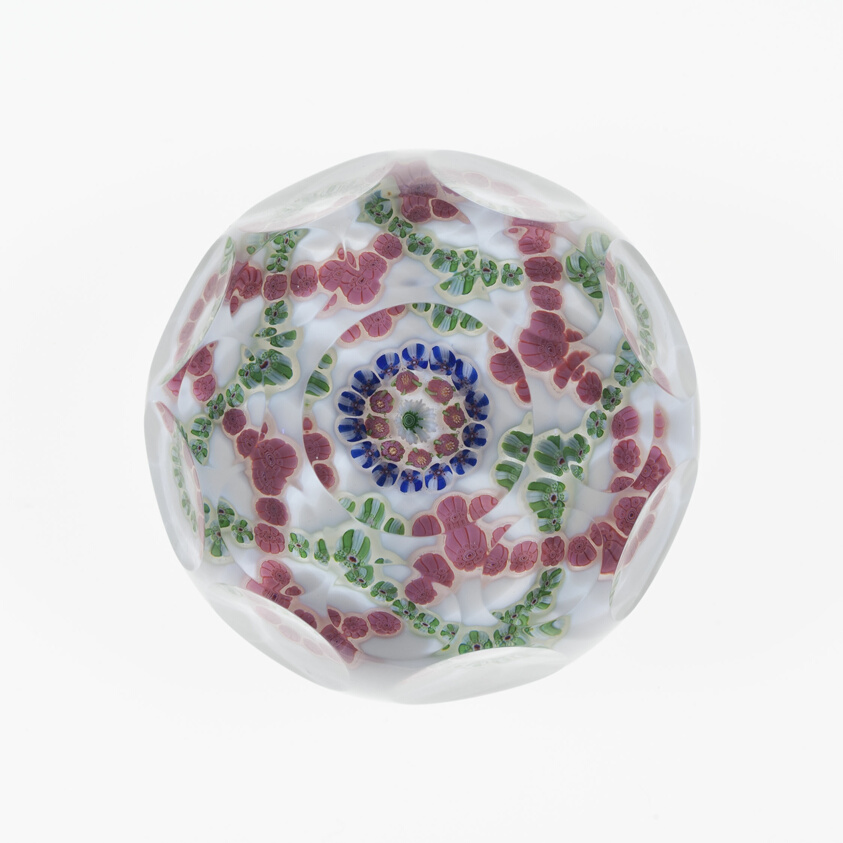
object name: Glass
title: Paperweight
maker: Clichy Glassworks (Cristalleries de Clichy); Clichy, France, 1837-1885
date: c. 1845/60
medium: Glass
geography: France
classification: paperweight; glass